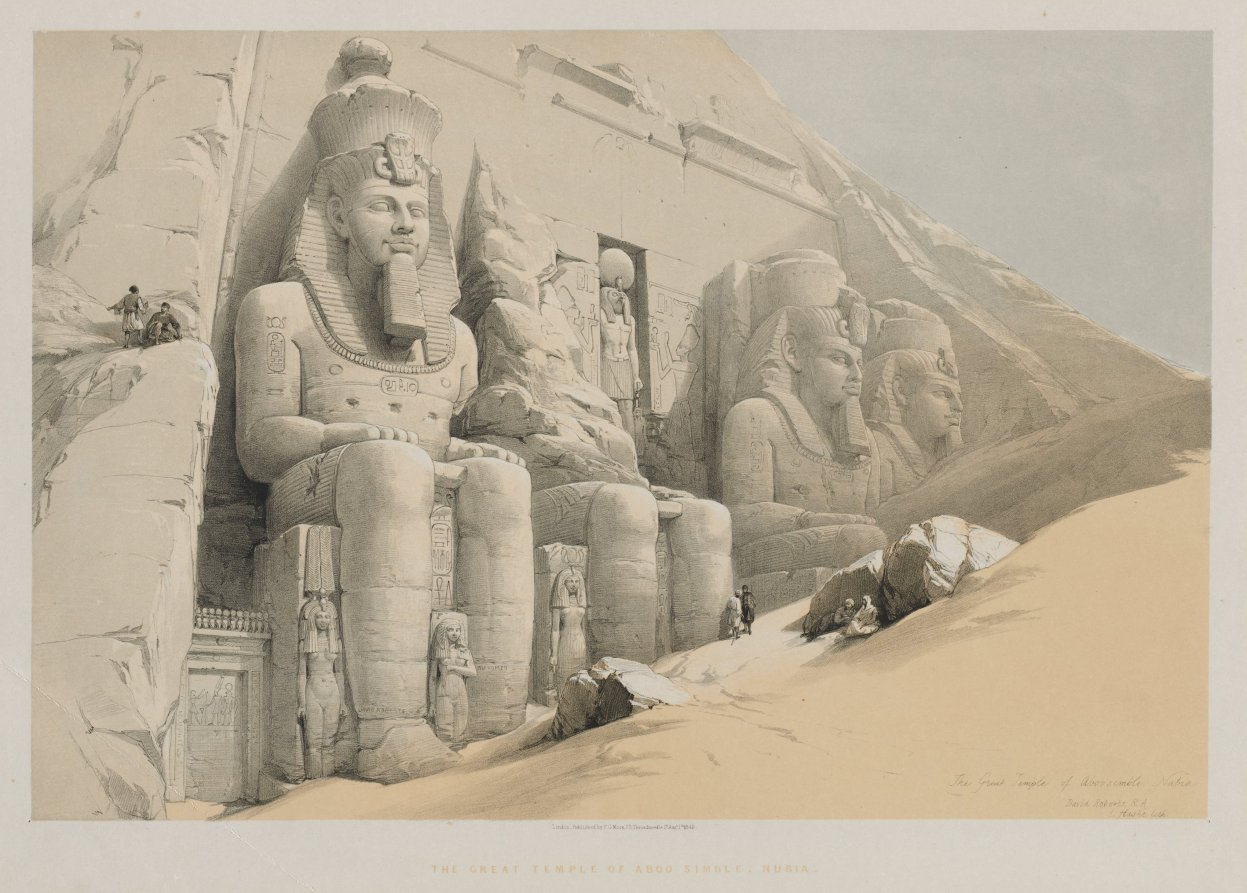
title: Egypt and Nubia, Volume I: The Great Temple of Aboo-Simble, Nubia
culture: England, 19th century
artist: Louis Haghe (British, 1806–1885)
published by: F. G. Moon (British, 1797–1871)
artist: after David Roberts (Scottish, 1796–1864)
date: 1846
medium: color lithograph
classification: Print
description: Throughout the 1800s and into the 1900s, prints, paintings, and photographs, like Louis Haghe’s Egypt and Nubia series, brought back by artists who voyaged to Egypt, inspired American and European artists, architects, and designers to emulate ancient Egyptian motifs and styles. Egyptomania blossomed through the 1800s and can be seen in architecture around cities like Washington, DC, and in the interiors of aristocratic homes, as well as in funerary monuments, such as in Lake View Cemetery in Cleveland, Ohio. Looking back at these creations provides an interesting historical groundwork for debating who has the right to interpret Egyptian motifs and styles.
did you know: Louis Haghe was appointed Lithographer to the Queen in 1838.